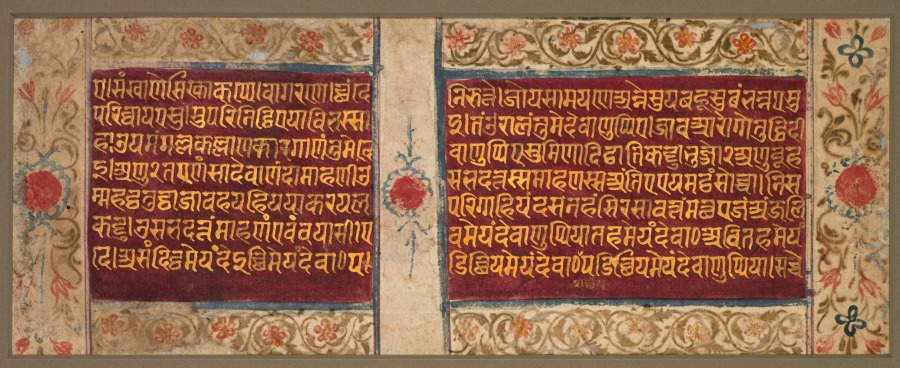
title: Brahman Rishabhadatta's speech, folio 5 from a Kalpa-sutra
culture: Western India, Gujarat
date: c. 1475–1500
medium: gum tempera and gold on paper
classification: Painting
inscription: [[recto, beginning with line 1]] devāṇuppie | sumiṇā diṭṭhā | taṁ || attha lābho devāṇuppie | bhoga lābho | sutta lābho | sukha lā- [line 2] bho de° || evaṁ khalu tumaṁ devāṇuppie navaṇhaṁ māsāṇaṁ bahupaḍipunnāṇaṁ | addh’aṭṭhamāṇaṁ rāïṁdi- [line 3] yāṇaṁ | viïkkaṁtāṇaṁ sukumāla-pāṇi-pāyaṁ | ahīṇa-paḍipunna-paṁc’iṁdiya-sarīraṁ lakkhaṇa-vaṁjaṇa-gu- [line 4] ṇovaveyaṁ māṇ’ummāṇa-pamāṇa-paḍipunna-sujāya-savv’aṁga-suṁdar’aṁga | sasi-somākāraṁ | kaṁtaṁ piyadaṁ | [line 5] saṇaṁ surūvaṁ dārayaṁ payāhisi | se vi ya ṇaṁ dārae | ummukka-bāla-bhāve vinnāya-pariṇaya-mitte | jo- [line 6] vvaṇagam’anupatte | riuveya-yaüvveya-sāma|veya|-atthavvaṇaveya iïhāsaṁ paṁcamāṇaṁ nighaṁṭu-cha- [line 7] ṭṭhāṇaṁ s’aṁgovaṁgāṇaṁ sarahassāṇaṁ | caüṇhaṁ veyāṇaṁ sārae pārae dhārae saḍ’aṁgavī saṭṭhi-taṁtaṁ visāra-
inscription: [[verso, beginning with line 1]] e | saṁkhāṇe sikkhā kappe | vāgaraṇe | cchaṁde nirutte | joyasām=ayaṇe annesu ya bahūsu baṁbhannaesu [line 2] parivvāyaesu | supariniṭṭhie yāvi bha[vi]ssa|i taṁ orālaṁ tume devāṇuppie | jāva ārogge-tuṭṭhidī- [line 3] –hāüya-maṁgalla-kallāṇa-kāragā ṇaṁ tume devāṇuppie sumiṇā diṭṭhā ti kaṭṭu bhujjo 2 aṇuvūha- [line 4] ï | aṇu 2 tae ṇaṁ sā Devāṇaṁdā māhaṇī Usabhadattassa māhaṇassa aṁtie eyam=aṭṭhaṁ soccā | nisa- [line 5] mma haṭṭha-tuṭṭhā jāva haya-hiyayā kara-yala-pariggahiyaṁ dasa-nahaṁ sirasā vattaṁ matthae jaṁ aṁjali [line 6] kaṭṭu | Usabhadattaṁ māhaṇaṁ evaṁ vayāsī | evam=eyaṁ devāṇuppiyā taham=eyaṁ devā° avitaham=eyaṁ [line 7] de | asaṁdiṭṭham=eyaṁ de icchi[ya]m=eyaṁ devā° pa|ḍicchiyam=eyaṁ devā° paḍicchiyam =eyaṁ devāṇuppiyā | sacce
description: Manuscripts of the Kalpa-sutra are sacred embodiments of Jain doctrine. For this reason, they are worthy of beautification, adornment, and celebration by the inhabitants of heaven, such as the celestial dancers under cusped arches on this page. The commissioning of a manuscript is believed to cleanse donors of the karmic effects of past wrongdoing. Wealthy donors gained prestige in the community with the costly production of a sacred manuscript.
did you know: The "further eye" extending beyond the bounds of the face is a characteristic of 15th-century painting.